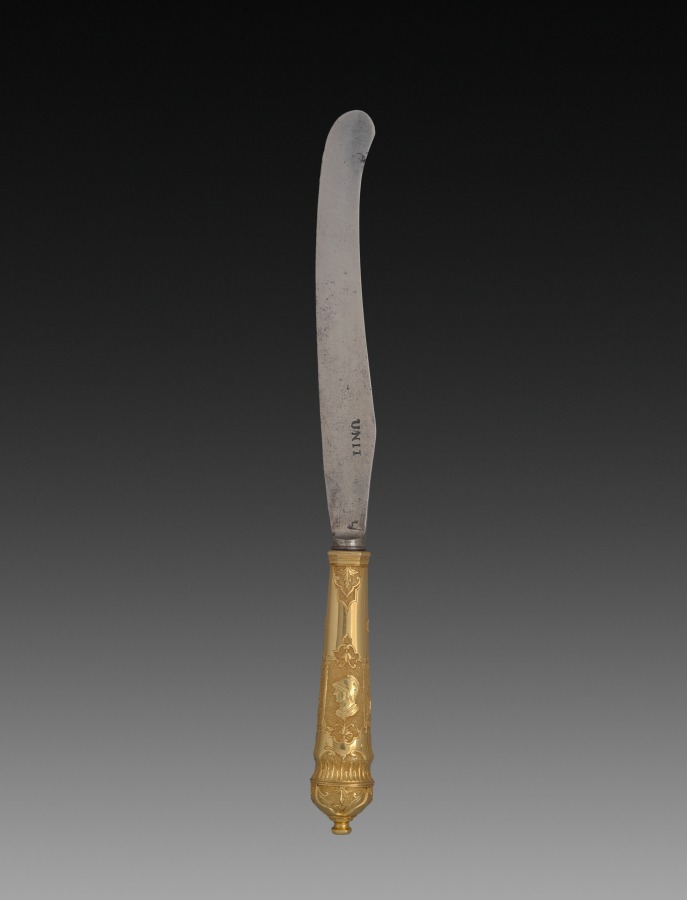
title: Knife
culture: Germany, Augsburg(?), 18th century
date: c. 1725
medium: gold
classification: Metalwork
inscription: steel blade inscribed: UNI(T ?).